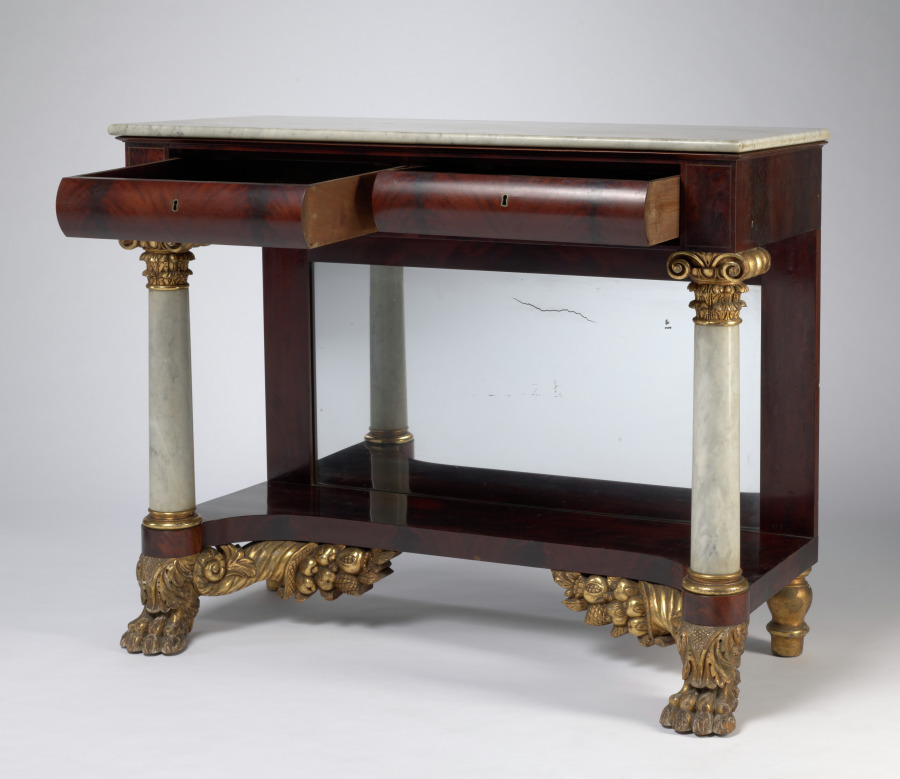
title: Console Table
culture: America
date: 1820–30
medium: mahogany and mahogany veneer with marble top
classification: Furniture and woodwork